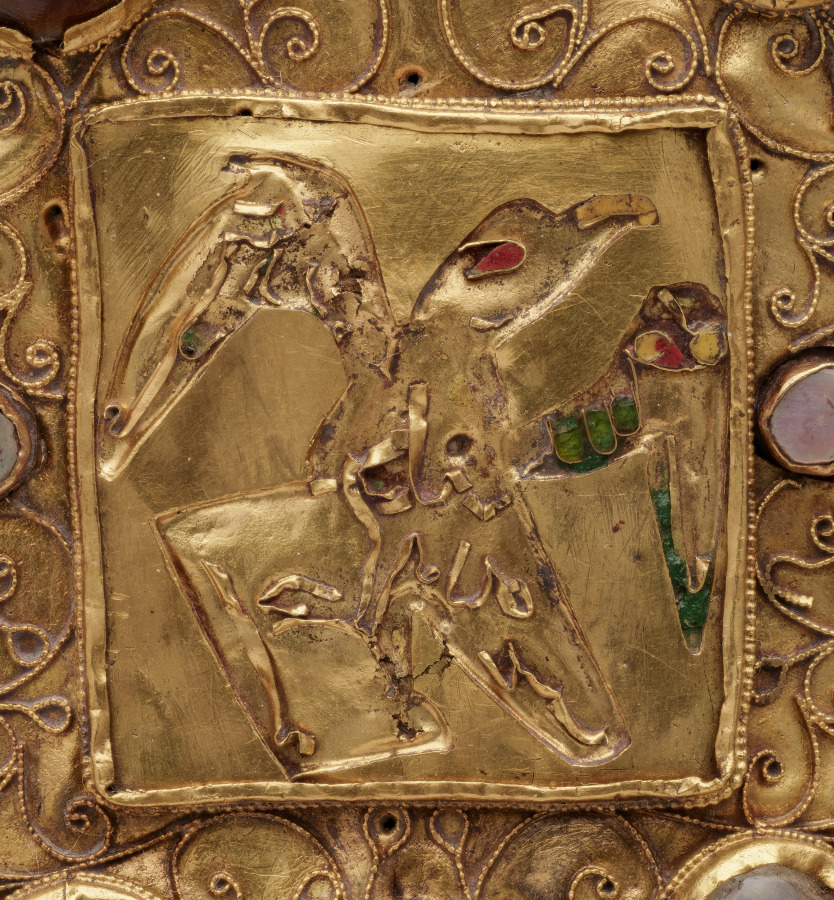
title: Ceremonial Cross of Countess Gertrude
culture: Germany, Lower Saxony?, 11th century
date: 1038 or shortly after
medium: gold: worked in repoussé; cloisonné enamel, intaglio gems, pearls, wood core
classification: Metalwork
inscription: translation of inscription on back: For the Relics of the Holy Apostle Peter and the Holy Virgin Liutrudis, Countess Gertrude Ordered this made.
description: This precious gold cross was commissioned by Countess Gertrude (died 1077) and given to the church of Saint Blaise following the death of her husband, Count Liudolf of Brunswick (died 1038). The cross was intended to be carried in liturgical processions or to be placed on a church altar. The inclusion of relics within the crosses endowed them with an additional role as devotional objects. At the center of the four cross arms, fine but much damaged cloisonné enamel plaques represent the symbols of the four Evangelists--an eagle for Saint John (above); a lion for Saint Mark (on the left); an ox for Saint Luke (on the right); and an angel for Saint Matthew (below). Pearls and precious and semiprecious stones are set within an intricate network of gold filigree while a large sapphire, inscribed in a circle and likewise surrounded by pearls and precious stones, is placed at the crossing.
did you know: Countess Gertrude's name appears on the back of the cross at the bottom.